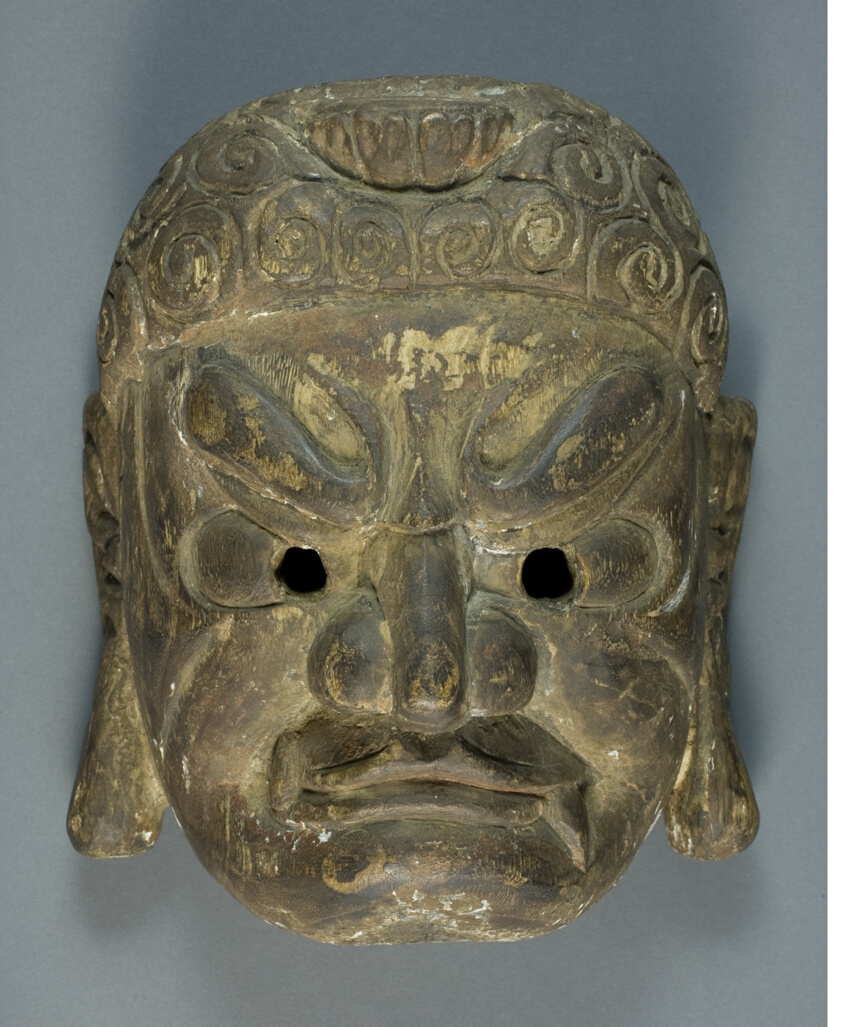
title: Fudo Myo-o mask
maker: Artist unknown (Japanese)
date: 15th-16th century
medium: Wood with traces of color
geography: Japan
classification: wood; masks; asian art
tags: masks